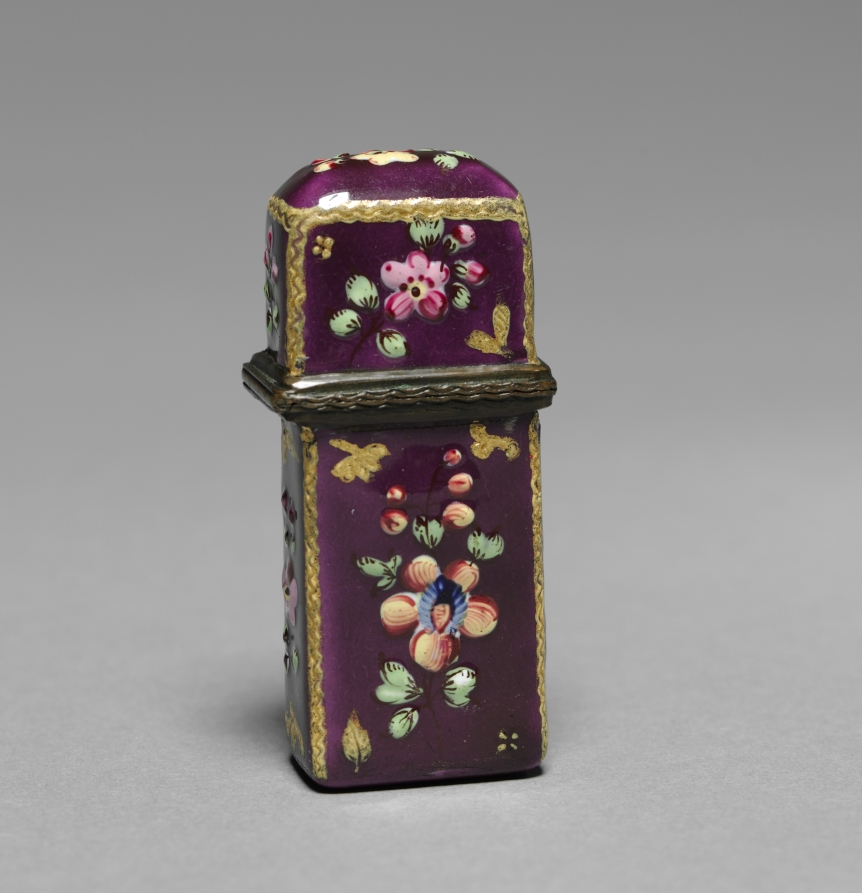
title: Etui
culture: Germany ?, 19th century copy of an 18th century Chelsea etui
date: 1800s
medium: enamel on copper with metal mounts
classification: Miscellaneous